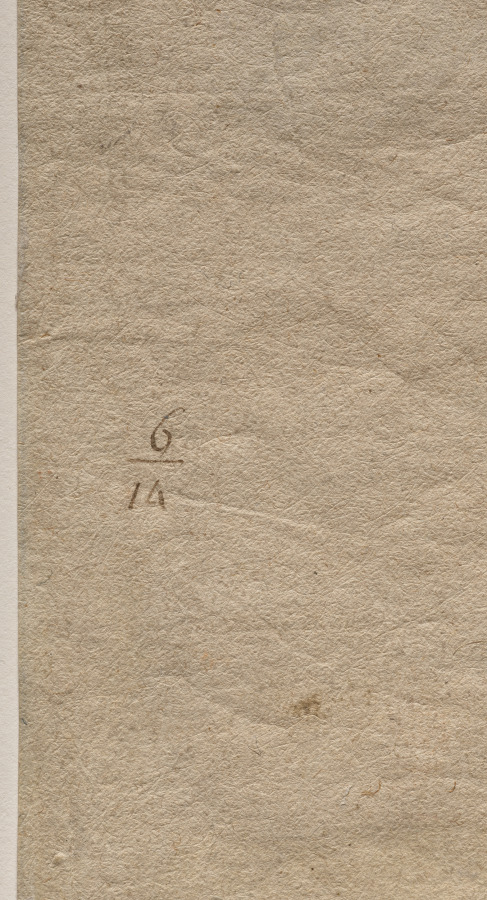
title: A Faun Grasping a Bunch of Grapes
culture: Flanders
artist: studio of Peter Paul Rubens (Flemish, 1577–1640)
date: after 1616–18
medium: black chalk and brush and brown wash; framing lines in pen and black ink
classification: Drawing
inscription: VERSO, upper right, in brown ink: no 40 ; lower left, in brown ink: 6/14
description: This drawing relates to a finished painting (now lost) by Peter Paul Rubens that depicted a faun (a woodland creature similar to a satyr) squeezing grapes into the mouth of a young Bacchus. That figure, shown here, could be Silenus, who educated Bacchus on the pleasures of wine, revelry, and nature. Rubens ran a large studio and employed numerous apprentices, one of whom may have made this copy after the original painting. As a form of instruction, Rubens added ink wash to the drawing to enhance the shading on the figure and shadows behind it.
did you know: Swirling draperies like the one haphazardly worn by this faun do more than conceal, in many cases they reveal an artist's technical skill. To render folds and gathers in fabric, artists used chiaroscuro, meaning contrasting light and dark tones.